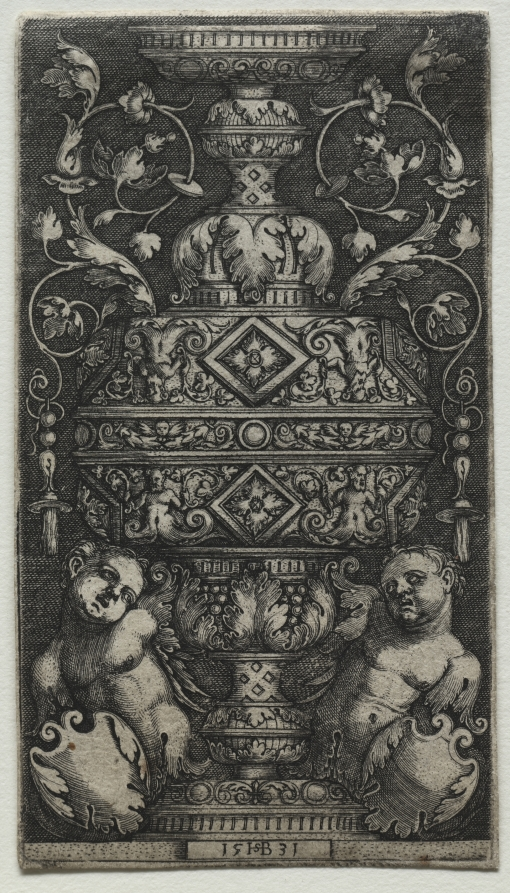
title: Vase Orné d'Enfans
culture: Germany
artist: Hans Sebald Beham (German, 1500–1550)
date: 1531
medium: engraving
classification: Print